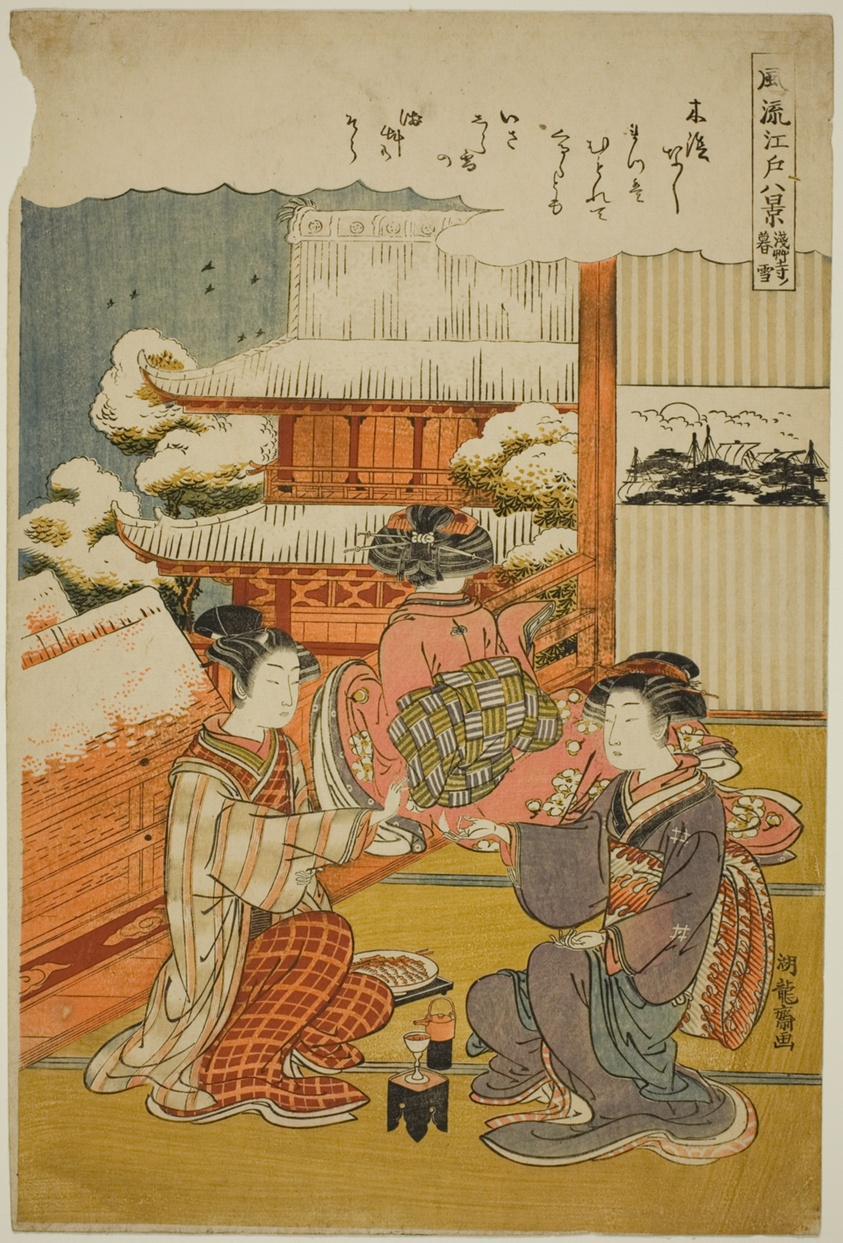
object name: Print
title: Evening Snow at Sensoji Temple (Sensoji no bosetsu), from the series "Eight Fashionable View of Edo (Furyu Edo hakkei)"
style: Japanese (culture or style)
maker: Isoda Koryusai (Japanese, 1735-1790)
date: c. 1776/81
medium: Color woodblock print; oban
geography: Japan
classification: woodblock print; print; asian art